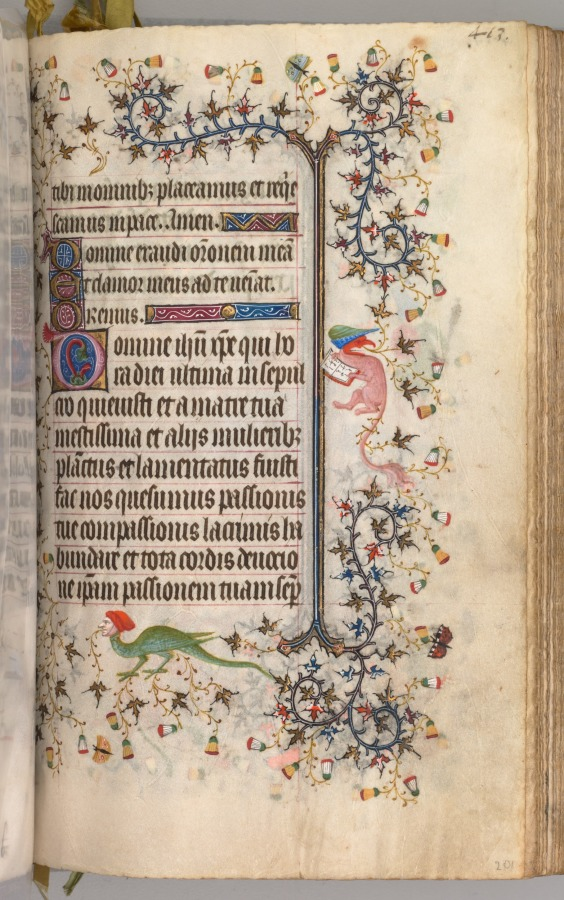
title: Hours of Charles the Noble, King of Navarre (1361-1425): fol. 2041r, Text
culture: France, Paris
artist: Master of the Brussels Initials and Associates (French)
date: c. 1405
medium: ink, tempera, and gold on vellum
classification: Bound Volume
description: This precious volume was obviously highly prized by its owner, the French-born King of Navarre, who had his coat of arms painted on no less than twenty folios. Rather than directly commissioning this manuscript from a specific workshop, it seems that Charles the Noble acquired his book of hours -- perhaps ready-made for the luxury market -- while on a trip to Paris in 1404-05. A collaborative effort, six painting styles are evidenced within the pages of this codex, those of two Italians, two Frenchmen, and two Netherlanders. The painter who was responsible for the planning and decoration of the book, and who produced seventeen of the large miniatures, was a Bolognese artist known as the Master of the Brussels Initials. His principal assistant, responsible for most of the borders, was a Florentine who signed his name "Zecho" da Firenze on folio 208 verso.